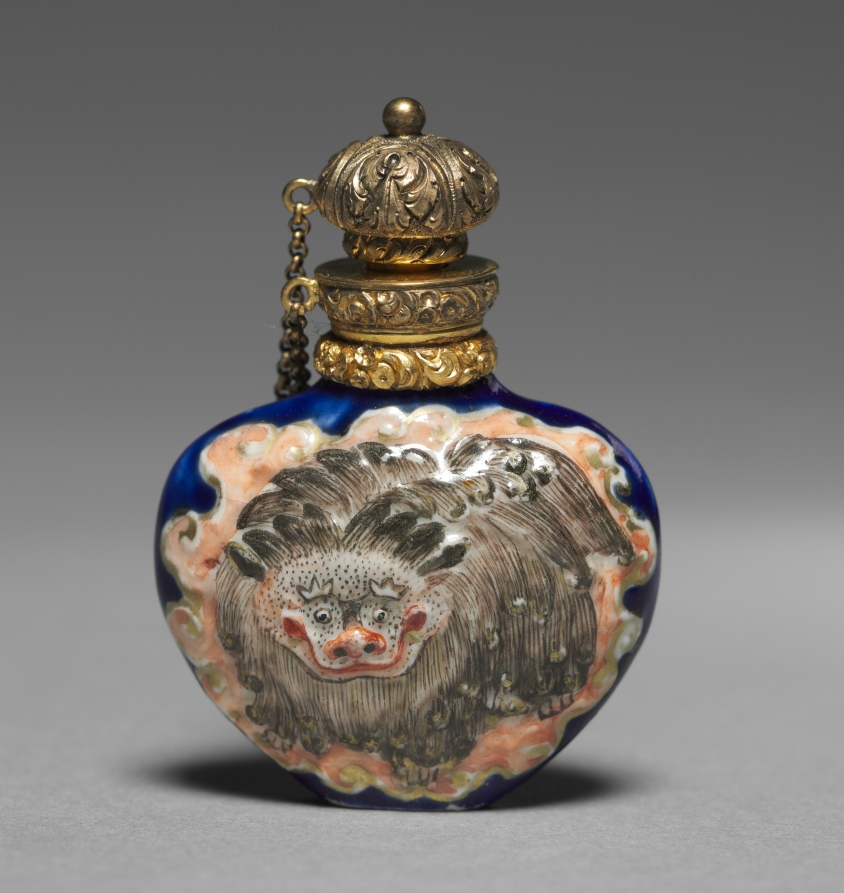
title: Scent Bottle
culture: France, 19th century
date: 1800s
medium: porcelain with gold or gilt metal mounts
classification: Miscellaneous